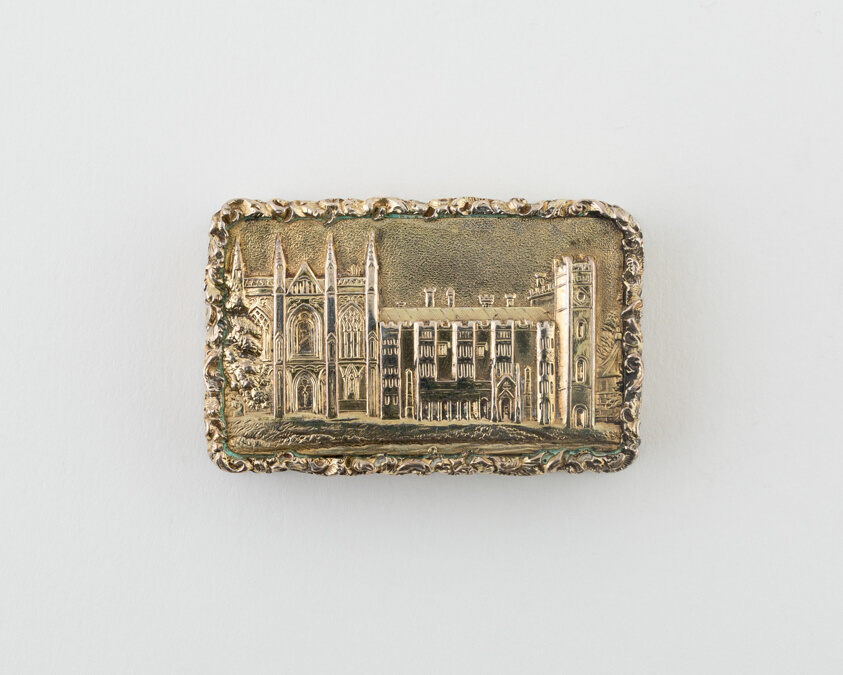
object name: Metalwork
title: Vinaigrette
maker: Taylor and Perry; Birmingham, England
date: 1836/37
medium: Silver and silver gilt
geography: Birmingham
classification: container for personal use; vinaigrette (container for health care); european decorative arts; metalwork; silver; decorative object/ornament